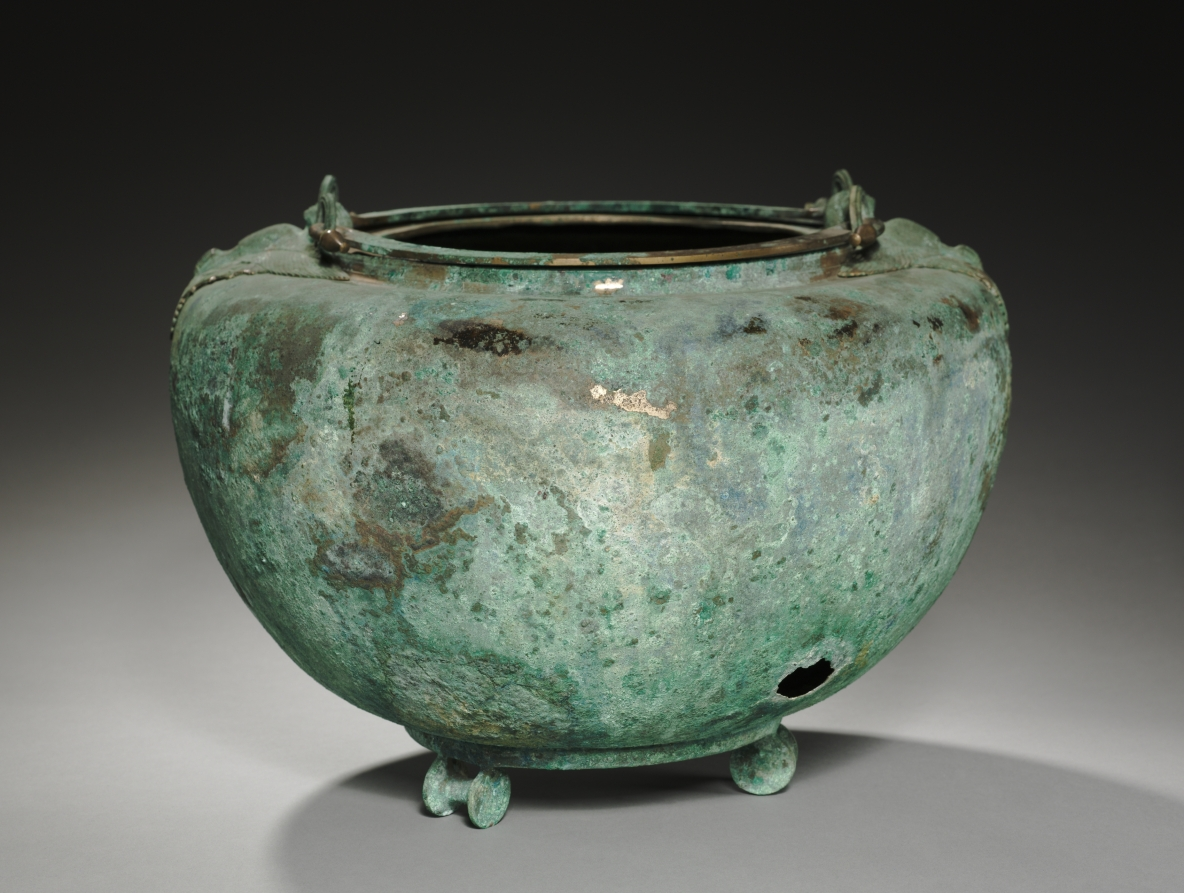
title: Lebes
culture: Greece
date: c. 480–460 BCE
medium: bronze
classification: Metalwork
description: This bronze cauldron has a ring base with three spool feet. Appliqués shaped like birds with the heads of women decorate the shoulder on either side of the vessel. Two handles are fastened to loops on the top of each creature’s wings. The bird-women may represent sirens, mythical creatures that lured sailors with their singing, or harpies, wind spirits that stole food from the starving.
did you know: The green surface found on old bronze is a corrosion product formed when copper in the metal reacts to carbon dioxide and water.